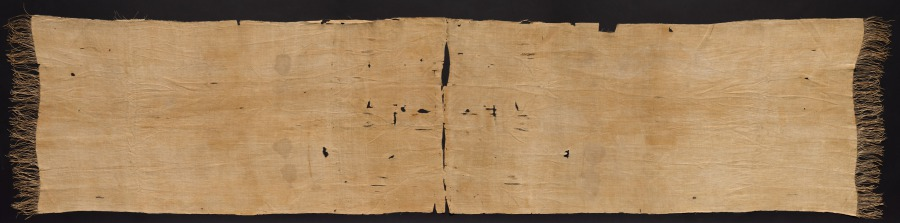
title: Mummy Linen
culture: Egypt, New Kingdom (1540–1069 BCE), Dynasty 18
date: 1540–1296 BCE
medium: linen: plain weave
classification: Textile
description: The distressed nature of this ensemble, top and skirt, is inspired by the deterioration of linen wrapped around a mummified body. Olivier Rousteing produced the Egyptian-influenced collection immediately after costuming musical artist Beyoncé’s 2018 Coachella performance, which included two ensembles inspired by Queen Nefertiti. Rousteing had resources like the Louvre Museum’s Egyptian art holdings at his disposal for research. The collection, including this ensemble, is experimental, exaggerating ancient Egyptian silhouettes and motifs to develop a fresh, youthful take on Egyptomania fashion.